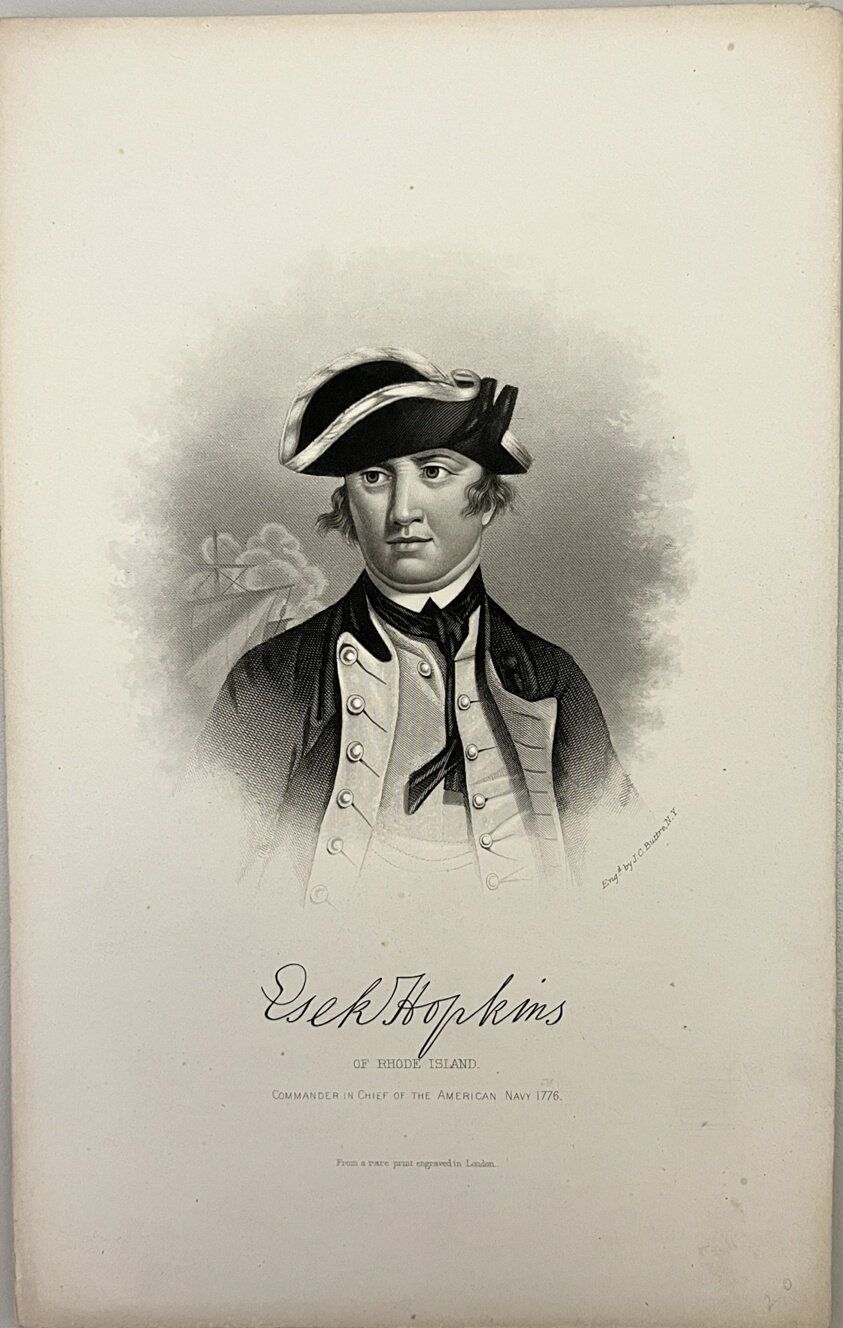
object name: Print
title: Esek Hopkins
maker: John Chester Buttre (American, 1821-1893); after Artist Unknown (British, 19th century); published by Thomas Hart (British, active 1776, died 1785)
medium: Stipple and line engraving on paper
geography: United States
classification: reproduction; print; prints and drawing